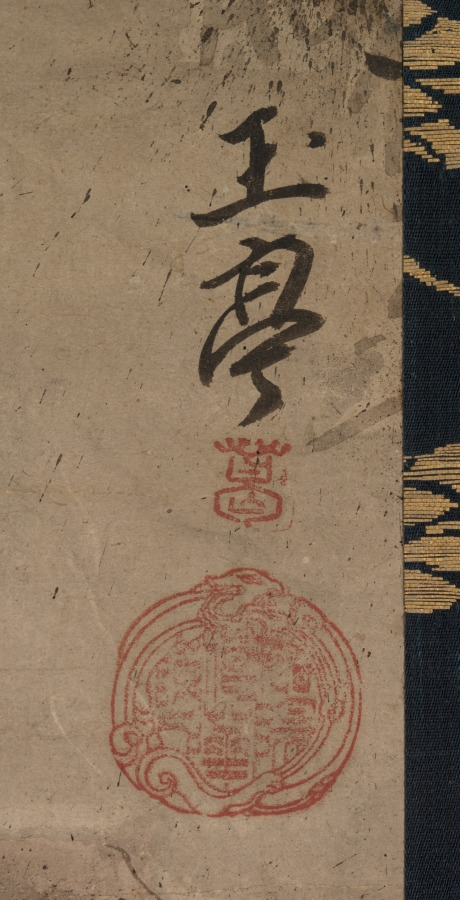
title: Monkeys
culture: Japan, Edo period (1615–1868)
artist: Gyokutei Katsu (Japanese)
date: c. 1800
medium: hanging scroll; ink on paper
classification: Painting